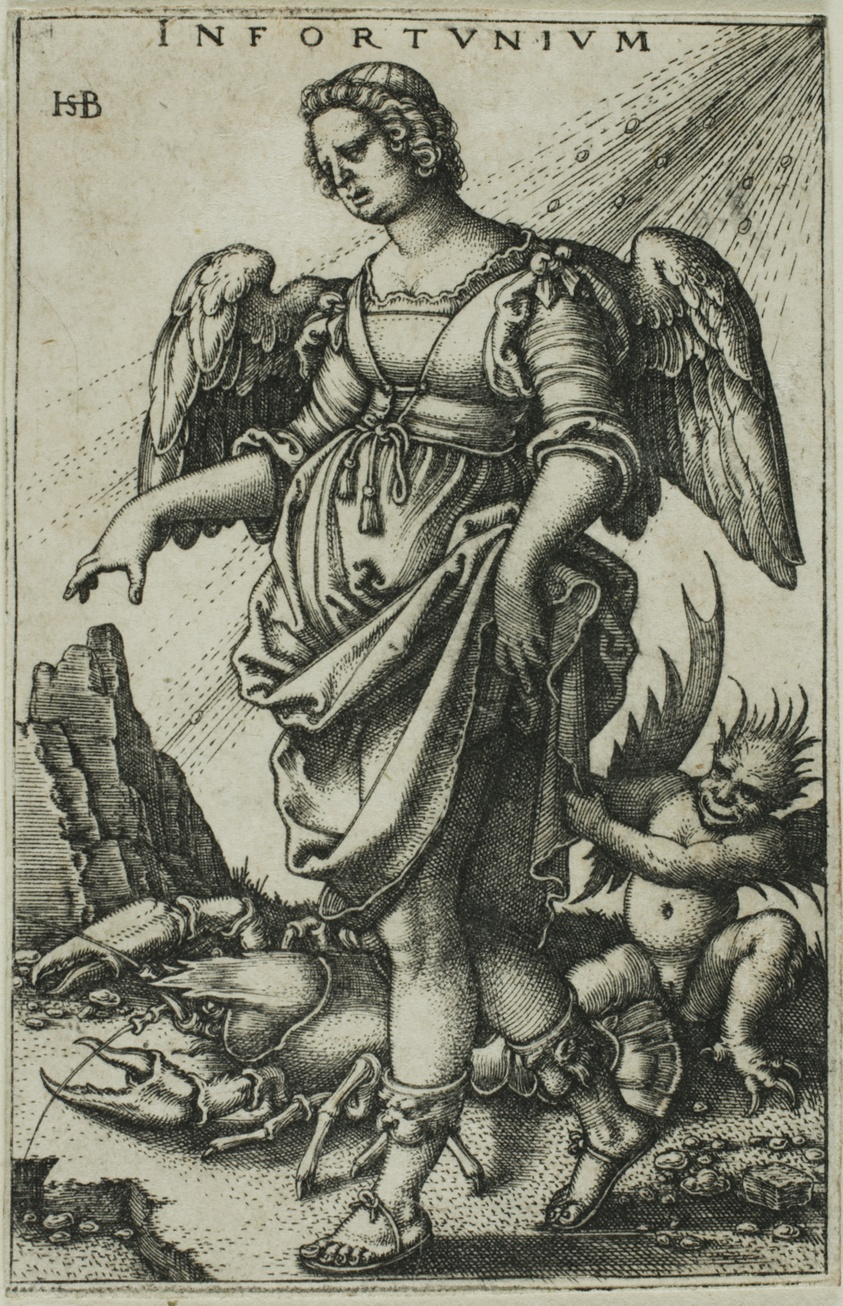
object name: Print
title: Misfortune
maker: Sebald Beham; German, 1500-1550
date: c. 1541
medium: Engraving in black on ivory laid paper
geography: Germany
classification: engraving; print; prints and drawing